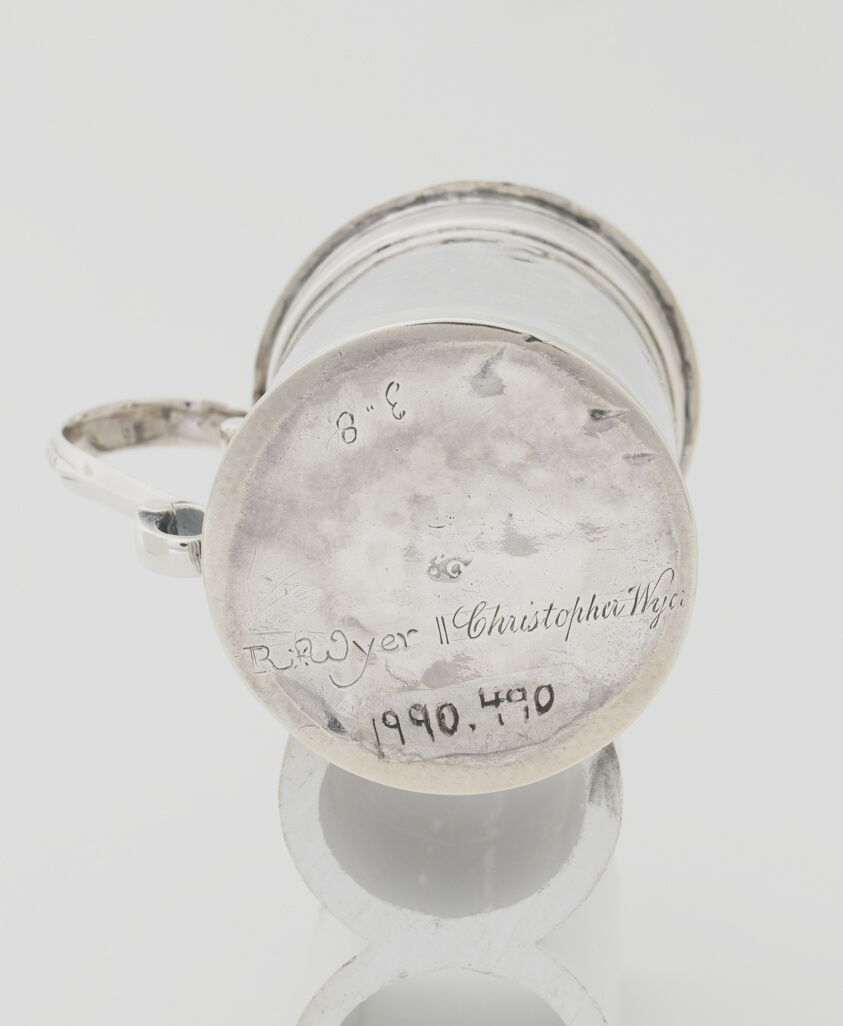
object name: Metalwork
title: Pepper Box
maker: William Cowell, Sr.; American, 1682/83–1736; Boston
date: c. 1720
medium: Silver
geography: Boston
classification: container; box; silver; american decorative arts; american arts; decorative arts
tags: dining, drinking